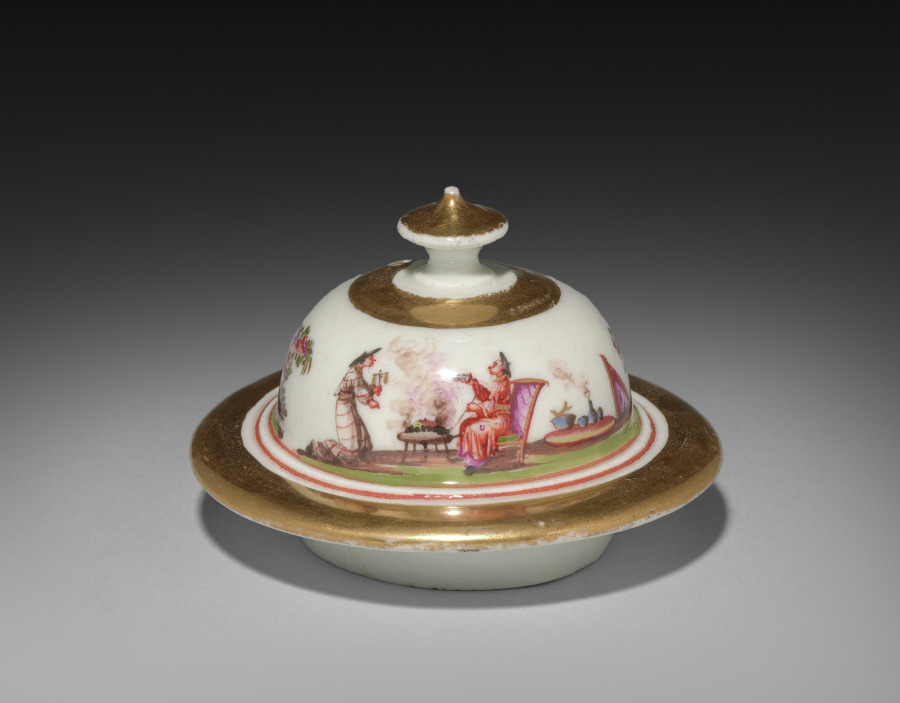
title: Tea Pot (lid)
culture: Germany, Meissen, 18th century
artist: Meissen Porcelain Factory (German, est. c. 1710)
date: c. 1723–24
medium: gilt porcelain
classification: Ceramic